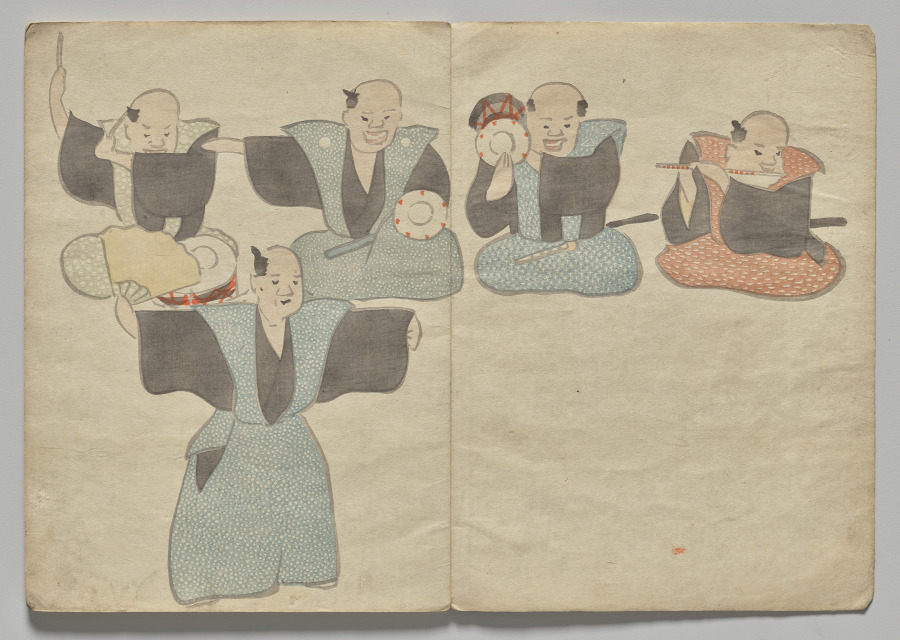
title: Scene from The Kōrin Picture Book (Volume 1)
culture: Japan, Edo period (1615–1868)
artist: Nakamura Hōchū (Japanese, d. 1819)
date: 1800s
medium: color woodblock printed book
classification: Bound Volume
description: Ogata Korin (1658-1716) was one of the most admired artists of Rimpa, or "decorative school painting." These books by the charming later-generation Rimpa artist Hochu record Korin's inventive designs.